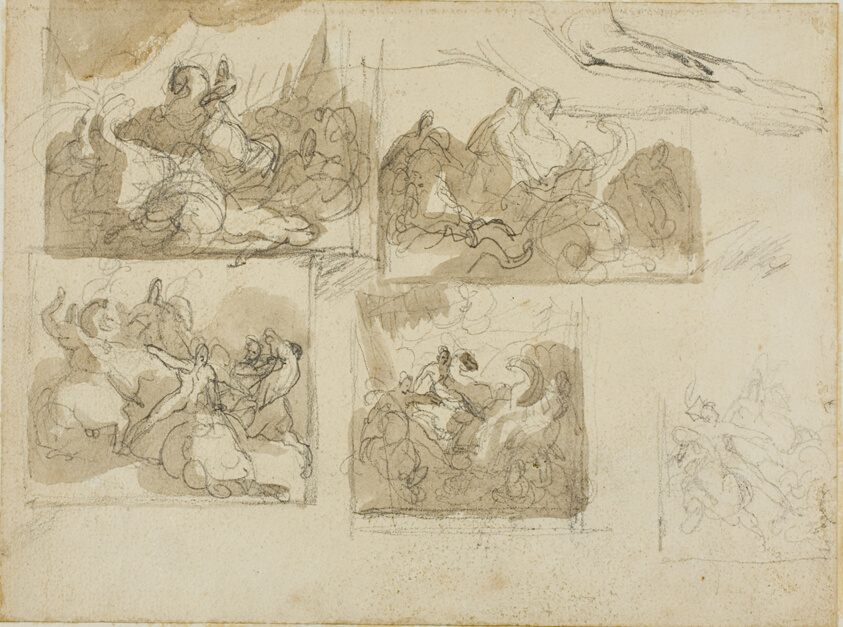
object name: Drawing and Watercolor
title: Sketches of a Cavalry Battle and the Forepaws of a Dog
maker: Jean Louis André Théodore Géricault (French, 1791-1824)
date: 1813/14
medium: Graphite with brush and brown wash on cream wove paper, perimeter mounted on ivory laid paper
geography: France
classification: drawings (visual works); prints and drawing